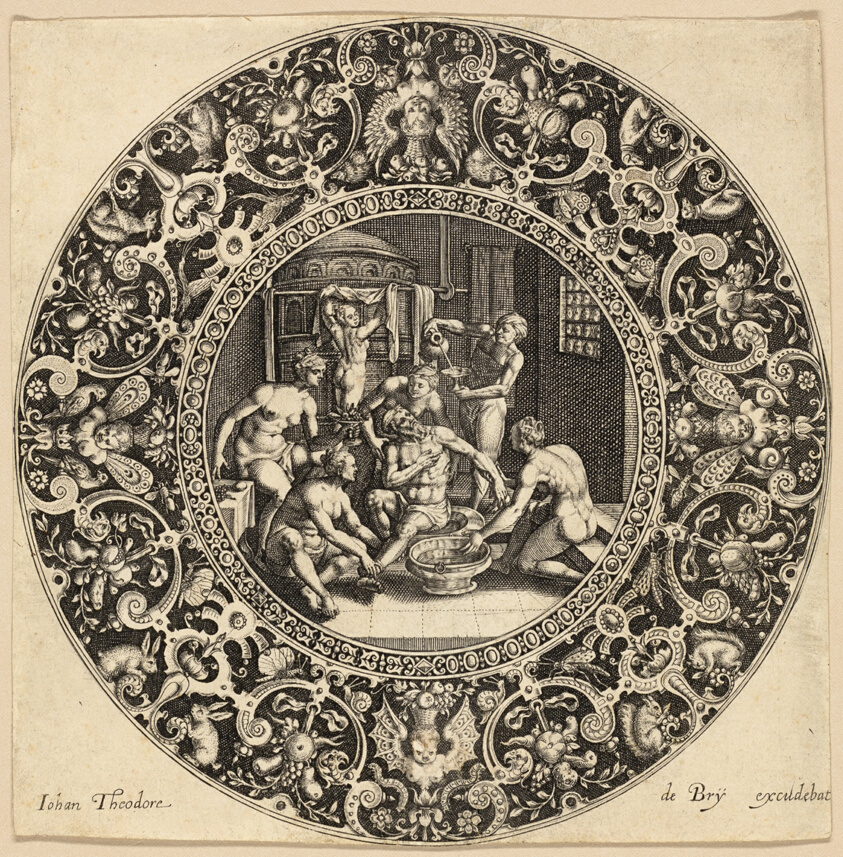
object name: Print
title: Bath of Sardanapalus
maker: Johann Theodor de Bry (German, 1561-1623); after Marten de Vos (Flemish, 1532-1603)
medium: Engraving in black on ivory laid paper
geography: Germany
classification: engraving; print; prints and drawing